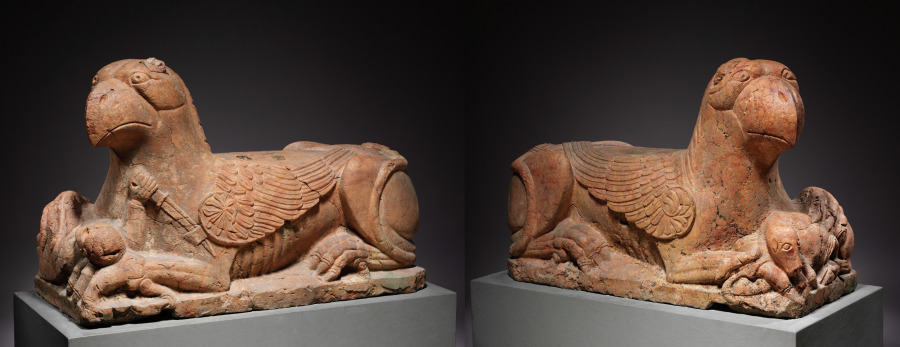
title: Guardian Griffin (pair)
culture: Northern Italy, Emilia, 12th century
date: 1150–1175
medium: pink limestone (called "Verona Marble")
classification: Sculpture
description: Griffins are fabled creatures that have the characteristics of an eagle and a lion—combining watchfulness and courage. In Christian art, the dual nature of the griffin was often used to signify that of Christ himself: divine (bird) and human (animal). Griffins were often used as guardian figures in church sculpture and were placed in portals and choir screens. The creatures seen here, with their inward-turning heads, were certainly used for such a purpose. When viewed from the front, one griffin may be seen clutching the figure of a knight between its paws, while the other griffin holds a calf. Their original function was probably to support the columns of a porch in front of a church doorway.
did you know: According to medieval bestiaries, griffins could tear a man to pieces and carry a whole bovine away, as seen here.